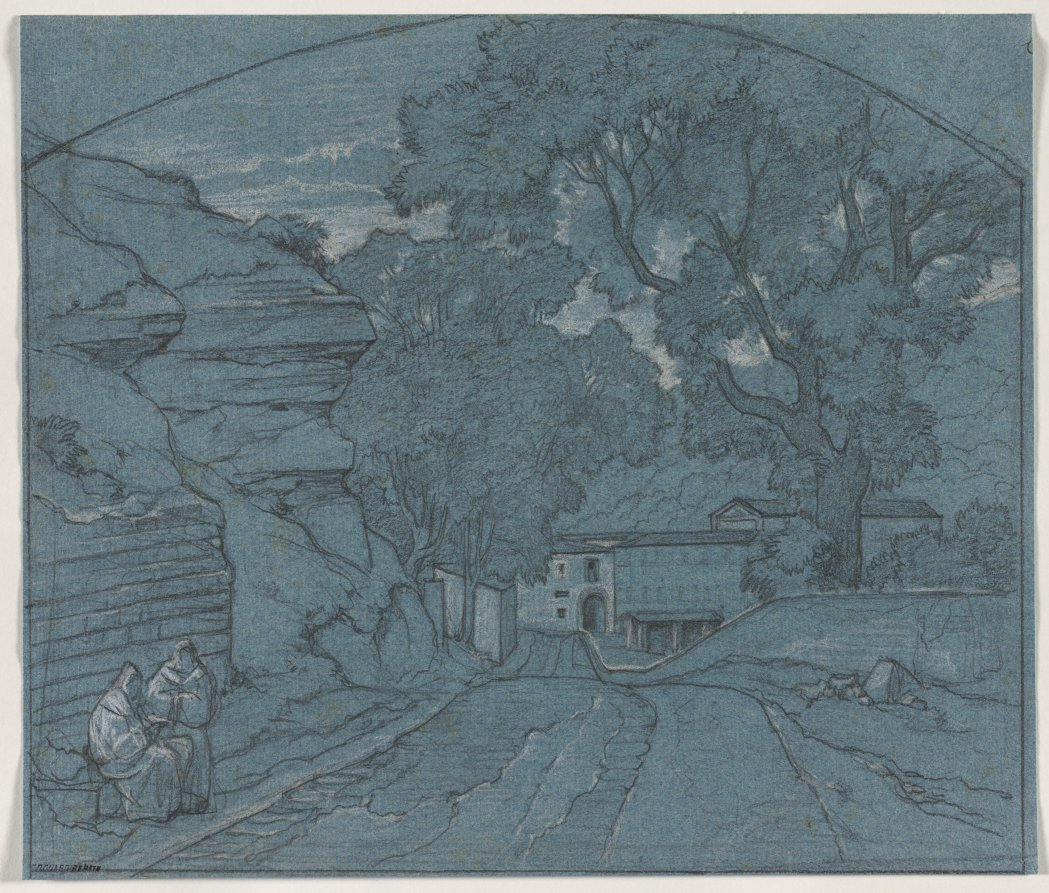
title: Landscape with Two Monks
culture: France, 19th century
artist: François Edouard Bertin (French, 1797–1871)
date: c. 1840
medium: graphite heightened with white chalk; framing lines (arched at top) in graphite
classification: Drawing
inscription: VERSO, lower right, in graphite: 227083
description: Bertin studied initially with Girodet and later with Ingres and from them acquired a grounding in classical landscape. He began his career by submitting a historical landscape to the Salon of 1827, but shortly thereafter he broke with classical tradition and devoted himself to painting and drawing from nature. He traveled widely in Europe, particularly in Italy, where he lived for more than a decade. In this drawing on blue paper, two monks populate an Italian roadside scene. Bertin combined a close examination of nature in the specific rendering of the trees and rocks with a clear, almost abstract organization of the planes that belies his classical training.